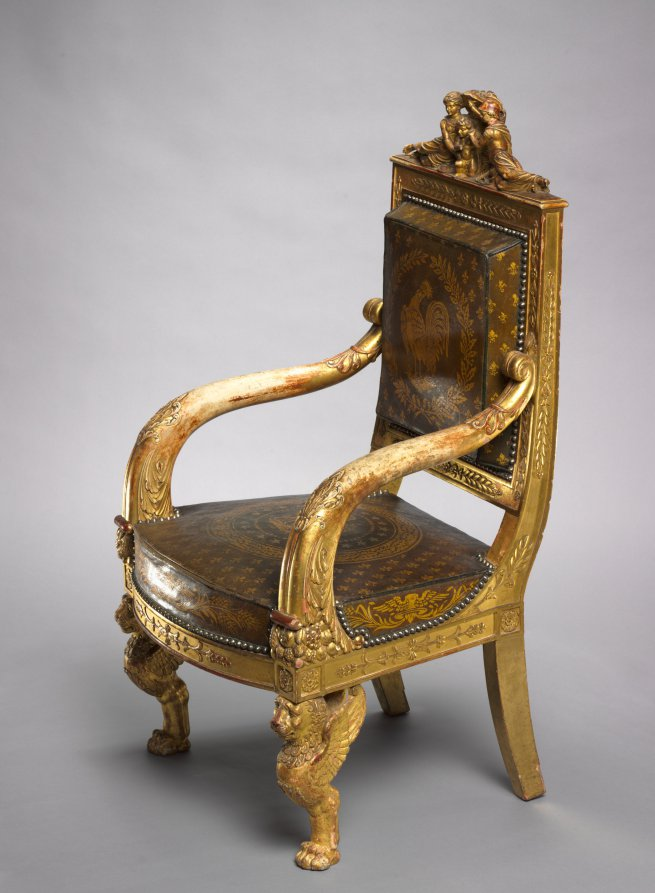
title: Child's Throne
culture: France, Paris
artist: Pierre-Marie Balny le Jeune (French, 1832)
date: 1822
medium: carved and gilded wood, leather upholstery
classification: Furniture and woodwork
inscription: inscribed with stencils inside back rail: BLONDEL TAPISSIER/RUE ST. ANTOINE N 72 1822 inscribed in ink lower edge back rail: 12 JANVIER 18[22?]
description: This chair was made for the young, presumed successor to the French throne who ruled briefly as Henri V in 1830, the last of the direct Bourbon line. He is depicted at the center of the top rail protected by female figures representing France and Minerva, the Roman goddess of wisdom. Fleurs-de-lis and the Gallic rooster, symbols of French royalty and the French people, decorate the upholstery.